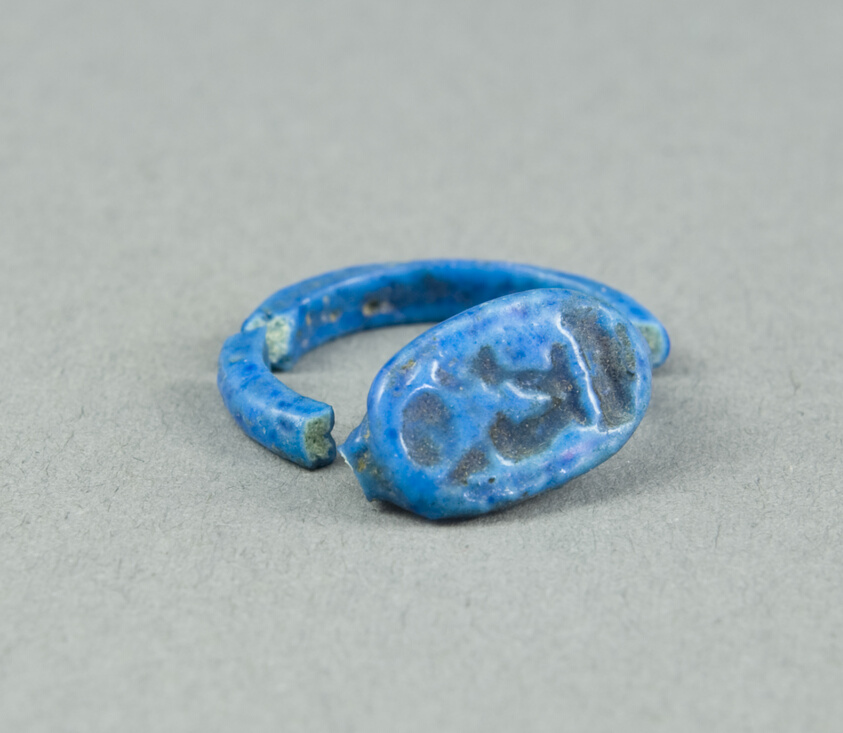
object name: Costume and Accessories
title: Ring: Menmaatre (Seti)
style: nineteenth dynasty, new kingdom, egyptian, ancient, ramesside period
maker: Egyptian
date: New Kingdom, Dynasty 19, reign of Seti I (about 1294–1279 BCE)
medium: Faience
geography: Egypt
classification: ring (jewelry); ceramics; jewelry; ancient art; costume; faïence (composite material)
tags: Hieroglyphs